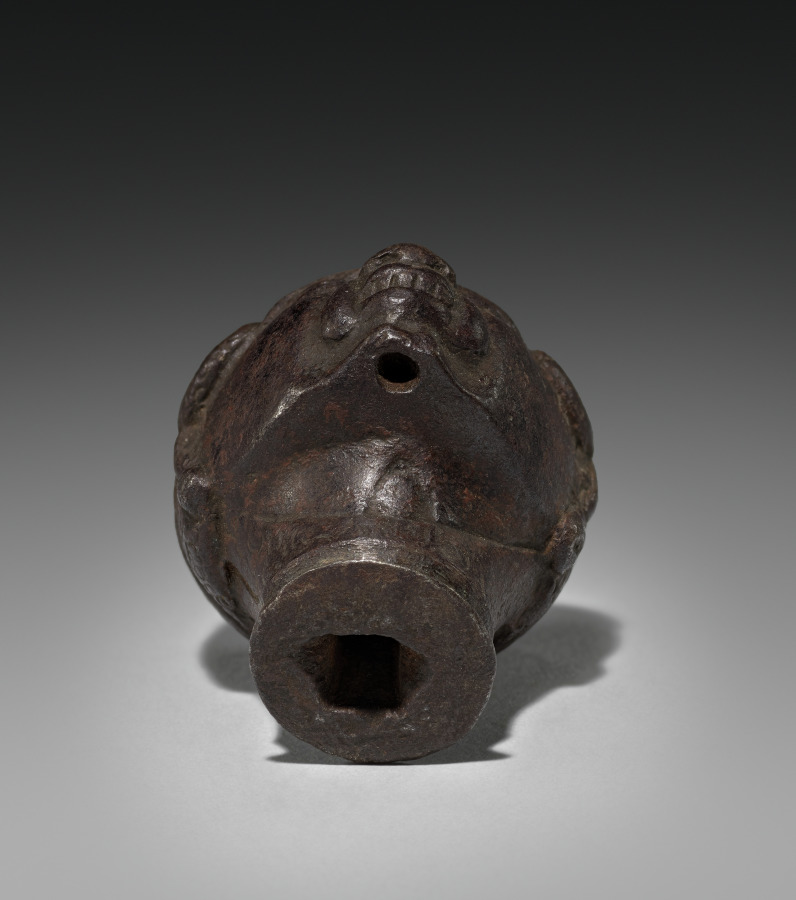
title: Pommel of Sword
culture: Italy, 17th century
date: 1600s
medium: steel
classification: Arms and Armor